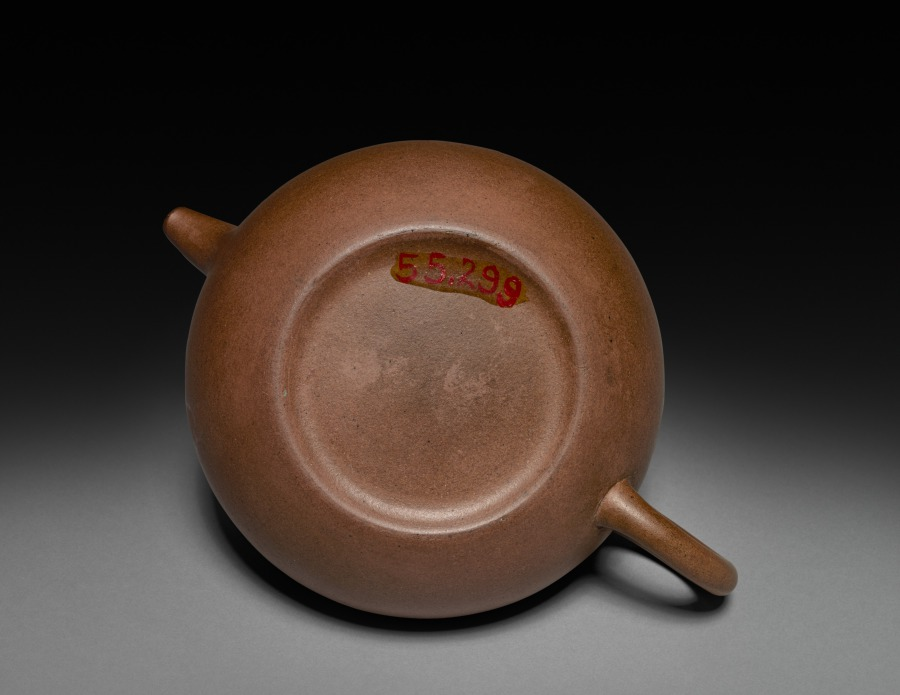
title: Teapot: Yixing ware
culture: China, Qing dynasty (1644-1911)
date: 1644–1911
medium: stoneware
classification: Ceramic